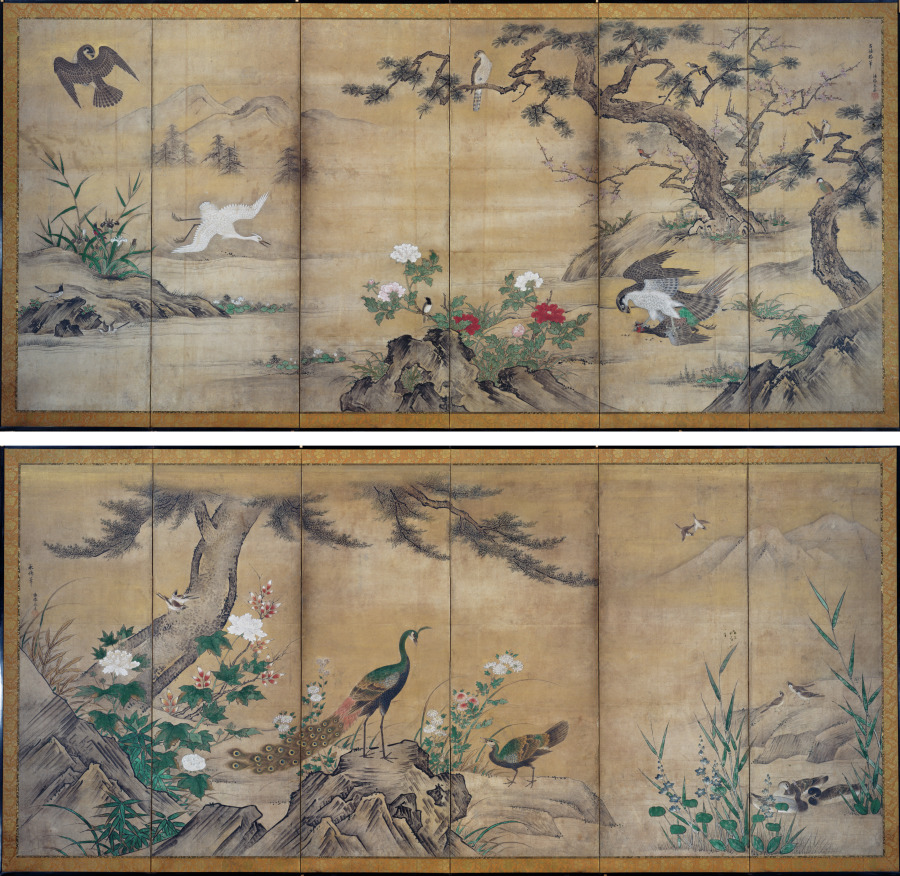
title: Birds and Flowers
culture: Japan, Momoyama period (1573–1615)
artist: Kano Mitsunobu (Japanese, 1565–1608)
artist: and Kano Shōei (Japanese, 1519–1592)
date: late 1500s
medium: Pair of six-panel folding screens; ink, color, and gold on paper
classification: Painting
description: The landscape depicted in this pair of screens follows a seasonal progression from right to left, starting with the blossoming plum of early spring and ending with late autumn peonies. A variety of smaller birds are positioned throughout the scene, and a trio of swimming ducks is bracketed by early summer irises and early autumn bellflowers at the center. While some raptors (birds of prey) terrorize a pheasant and an egret (a waterfowl) to the right, a peacock and peahen converse to the left. Hawks are associated with military prowess, while the peafowl suggest cultural prestige.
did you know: The inscriptions on these screens are not signatures of the artist, but instead an attribution to the painter Kano Eitoku (1543–1590) by his youngest brother, Kano Naganobu (1577–1654).